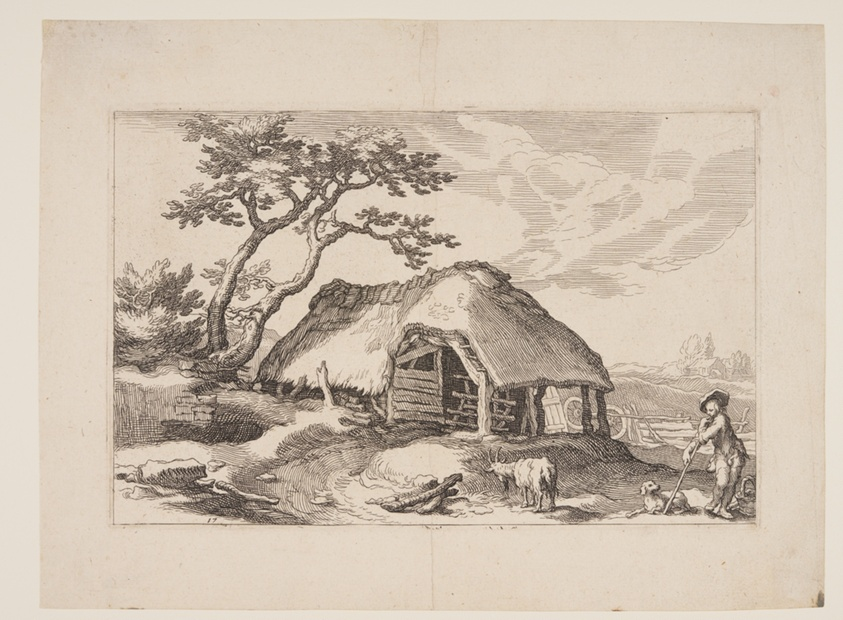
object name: Print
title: Plate 17, from Landscapes with Farmhouses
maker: Boëtius Adamsz. Bolswert (Flemish, 1580–1633); after Abraham Bloemaert (Dutch, 1566–1651)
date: 1614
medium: Etching on ivory laid paper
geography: Flanders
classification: print; paper; prints and drawing; etching